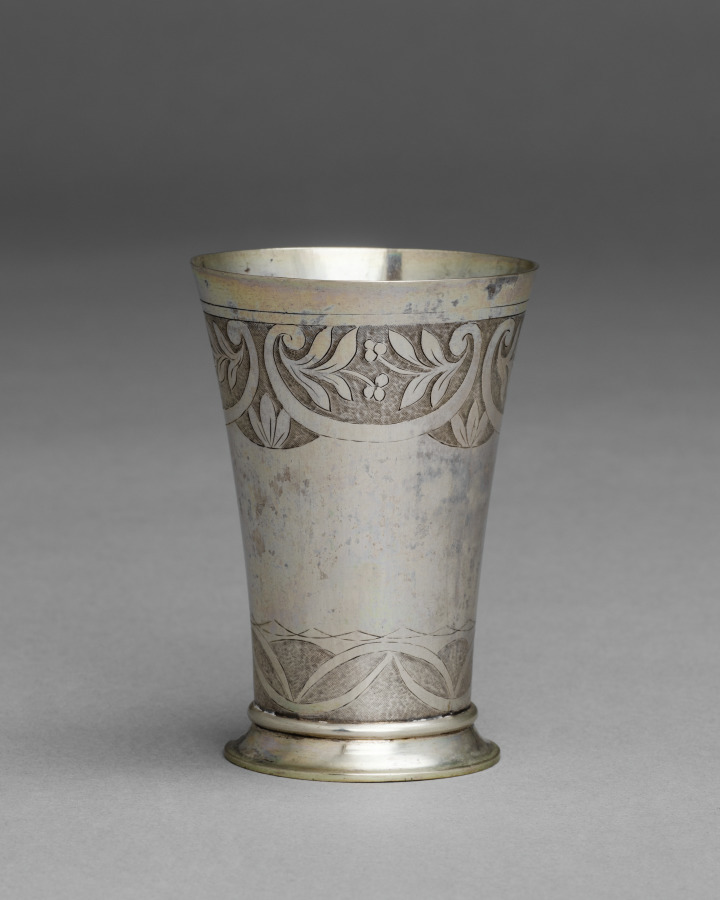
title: Beaker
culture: Austria, Vienna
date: 1807–12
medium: silver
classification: Silver